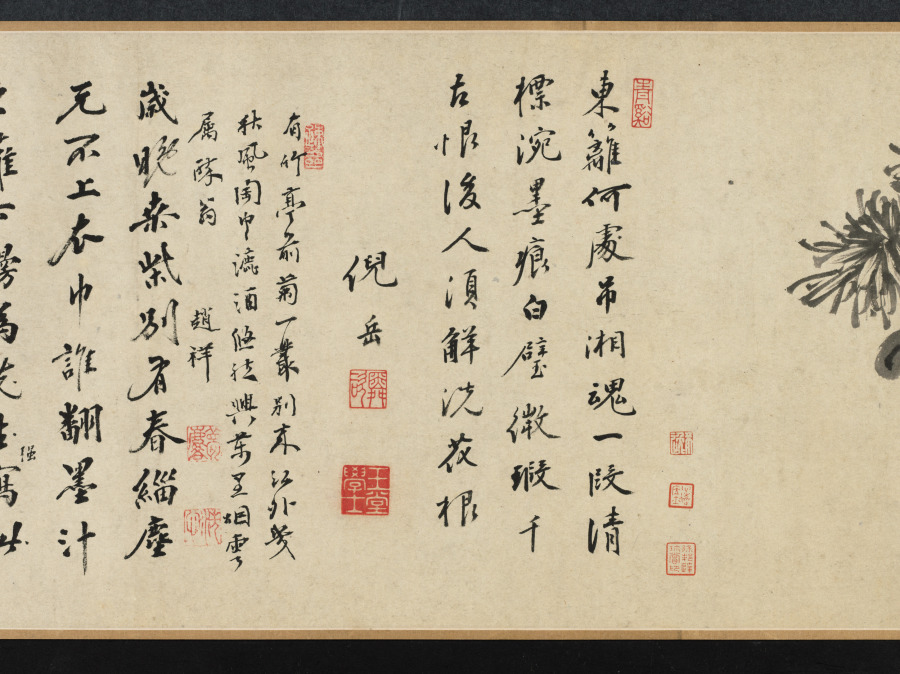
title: Chrysanthemums and Cabbage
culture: China, Ming dynasty (1368–1644)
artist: Tao Cheng (Chinese, active c. 1471–after 1502)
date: c. 1486 or before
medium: handscroll, ink and slight color on paper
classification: Painting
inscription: Artist's seal at beginning of painting: Yun hu 雲湖. Title by Wang Wenzhi 王文治 (1730–1802), date 1756. 2 seals of Wang Wenzhi 王文治 (1730-1802); 3 seals of Ku Yün (n. d.)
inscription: Section A (Chrysanthemums): 1 poem and 1 seal of Zhang Yuanzhen 張元禎 (1437–1507) - Jinshi, 1461; 1 poems and 3 seals of Ni Yue 倪岳 (1444–1501) - Jinshi, 1464; 1 poems and 2 seals of Zhao Xiang 趙祥 (life dates unknown) - Jinshi, 1469; 1 poems and 1 seals of Wu Xixian 吳希賢 (1437–1489) - Jinshi, 1464; 1 poems and 1 seals of Lü Chang 呂㦂 (1449–1511) - Juren, 1471; 1 poems and 3 seals of Fu Han 傅瀚 (1435–1502) - Jinshi, 1464; 1 poems and 1 seals of Feng Jue 馮珏 (life dates unknown) - Jinshi, 1478.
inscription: Chrysanthemums section, poem 1, by Zhang Yuanzhen 張元禎 (1437–1507): Several bushes of chrysanthemums grow in front of the Five-Willow Cottage,/ The yellow ones are really yellow and the white ones white./ This affable and decent fellow, young in years and unsophisticated,/ Has snapped one of the branches to dip in ink. (The Five-Willows Cottage was the home of the poet Tao Qian 陶潛 (Tao Yuanming 陶淵明, AD 365-427).) Chrysanthemums section, poem 2, by Ni Yue 倪岳 (1444–1501): Where at the Eastern Fence can you grieve for the Soul of the Xiang River?/ A man of upright character is mourned within the traces of ink./ White jade with a slight flaw would be a grievance forever,/ Later men should understand why even the roots of the flowers are washed. (Eastern Fence refers again to the poet Tao Qian 陶潛, while the Soul of the Hsiang River refers to the poet Qu Yuan 屈原 (c. 340–278 BC).) Chrysanthemums section, poem 3, by Zhao Xiang 趙祥 (life dates unknown): A clump of chrysanthemum grows in front of the bamboo pavilion,/ The winds of many autumns have blown since we parted beyond the river./ Straining wine through the official's cap of Tao [Qian] to prolong autumn's pleasures,/ The mists and clouds of ten thousand miles belong to the intoxicated. Chrysanthemums section, poem 4, by Wu Xixian 吳希賢 (1437–1489): It is a different spring if mulberry is planted during the latter part of the year,/ The dust of the world originally did not drop on clothing./ Who spills out ink under the Eastern Fence/ And paints so freely this portrait of chrysanthemums for the venerable Sir Tao? Chrysanthemums section, poem 5, by Lü Chang 呂㦂 (1449–1511): This full tray of ink for painting [flowers] at the Eastern Fence;/ Their whiteness or yellowness is not essential in capturing their beauty./ I don't have to go to Jiangnan to see them myself./ At my old house grow two or three branches. Chrysanthemums section, poem 6, by Fu Han 傅瀚 (1435–1502): Who daubed autumn flowers with ink/ As if they were dark dew on a branch tip only vaguely seen at evening?/ After the lazy clouds disperse, no one paints;/ A certain unconventionality pervades this painting. Chrysanthemums section, poem 7, by Feng Jue 馮珏 (life dates unknown): To satisfy his hunger, [the chrysanthemums] have at times entered the poetry of Qu Yuan;/ Taking up the wine cup, it felt close to Tao Qian./ [With them I am like] a lonely root sustained by deep water/ Or an old man to whose hair the color of youth returns.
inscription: Section B (Cabbage): 1 poem and 1 seal of Cai Qi 蔡圻 (life dates unknown) - degree information not known; 1 poems and 3 seals of Ni Yue 倪岳 (1444–1501) - Jinshi, 1464; 1 poem and 3 seals of Jiao Fang 焦芳 (1436–1517) - Jinshi, 1464; 1 poem and 3 seals of Li Dongyang 李東陽 (1447–1516) - Jinshi, 1464; 1 poems and 1 seals of Wu Xixian, signed “Xixian” 吳希賢 - Jinshi, 1464; 1 poems and 3 seals of Fu Han 傅瀚 (1435–1502) - Jinshi, 1464; 1 poems and 1 seals of Lü Chang 呂㦂 (1449–1511) - Juren, 1471; 1 poems and 2 seals of Zhao Xiang 趙祥 (life dates unknown) - Jinshi, 1469; 1 poems and 1 seals of Feng Jue 馮珏 (life dates unknown) - Jinshi, 1478.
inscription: Cabbage section, poem 1, by Cai Qi 蔡圻 (life dates unknown): The ink splashes are fresh from a frosty brush dipped in pond water;/ I can visualize that time when Yunhu 雲湖 [Tao Cheng] first showed his talents./ I lament the places where I scribbled before,/ Who would open them to inscribe a poem? (The first line is an allusion to the famous Jin dynasty calligrapher Wang Xizhi 王羲之 (AD 303-361), who practiced calligraphy so diligently at the edge of a pond that the water turned black with ink.) Cabbage section, poem 2, by Ni Yue 倪岳 (1444–1501): After rain the vegetables begin to grow;/ How are the colors of the masses lately!/ Once you get used to them, the tastiest parts are the ends of the roots;/ I don't know if they can be used for "seasoning soup." ("Seasoning soup" is an allusion to the statesmanship of a chief minister.) Cabbage section, poem 3, by Jiao Fang 焦芳 (1436–1517): This crop of purple stalks and green leaves is late and irregular;/ Now the rainy season is over for the Eastern Garden./ All the nobles nowadays dine on meat;/ Who of them knows the flavor of this [cabbage]. Cabbage section, poem 4, by Li Dongyang 李東陽 (1447–1516): It's always helped the honest man to sober up after drinks./ I intend to go to the deepest part of the stream-crossed garden/ To refresh myself in the fragrance and dew of evening. Cabbage section, poem 5, by Wu Xixian 吳希賢 (1437–1489): After rain, the white silk is filled with fragrant vegetables;/ How many times this happens in Mr. Tao's paintings./ On whom will you depend to present a memorial to the ruler?/ Don't let this color emerge on the faces of the people. (The last line is meant as a warning to officials: the color of the vegetables (green) may be pleasing in itself, but when it emerges on the faces of the starving poor, it signifies a badly governed world.) Cabbage section, poem 6, by Fu Han 傅瀚 (1435–1502): For twenty years I have feasted on the excellent mutton of an official;/ Yet I talk and dream about the garden and its vegetables./ Do not merely say it is good to chew the root of the cabbage--/ You must taste to understand what poverty is. Cabbage section, poem 7, by Lu Chang 呂㦂 (1449–1511): The capital is never a place for an apprentice in the "garden of scholarship."/ Who would write about gardens and vegetables on an examination paper?/ I've walked throughout the country in spring;/ Make sure the people don't show this color. Cabbage section, poem 8, by Zhao Xiang 趙祥 (life dates unknown): After a wash of rain, the spring garden is still in order;/ The flavor [of the cabbage] is more suitable with a small drink and the hum of a tune./ The rich and powerful in their mansions consume dish after dish of meat;/ Vegetarian food is known only by the scholars. Cabbage section, poem 9, by Feng Jue 馮珏 (life dates unknown): A new cabbage is nourished with dew;/ It takes a long time to grow and mature./ The business of "seasoning the soup" is your responsibility;/ Better command the gardener to take care [of the cabbages]. trans. HK/LYSL/WKH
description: On an autumn day in Beijing, Tao Cheng had a gathering with a group of scholar-officials and created two paintings in a spontaneous, casual style. The first depicts chrysanthemums, slender bamboo stalks, and a rock in monochrome ink. Tao applied light colors for the second painting that depicts cabbage. Tao deliberately placed the images on the first sections of the paper so that his honorable guests could add their poetic inscriptions inspired by his imagery. In the first section to the right, all seven poetic inscriptions refer to the beloved poet and recluse Tao Qian (also called Tao Yuanming, AD 365–427) who was particularly known for his profound love for chrysanthemum flowers. Most of the inscriptions in the second section express sympathy for the poor, since cabbage is the main ingredient in their humble food. Taken together, the poems and paintings allude to the life and responsibilities of the scholar-official: the importance of both an upright character and a concern for the poor citizens in order to achieve good government.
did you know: Eminent calligrapher Wang Wenzhi 王文治 was only 27 sui when he wrote the title in 1756.